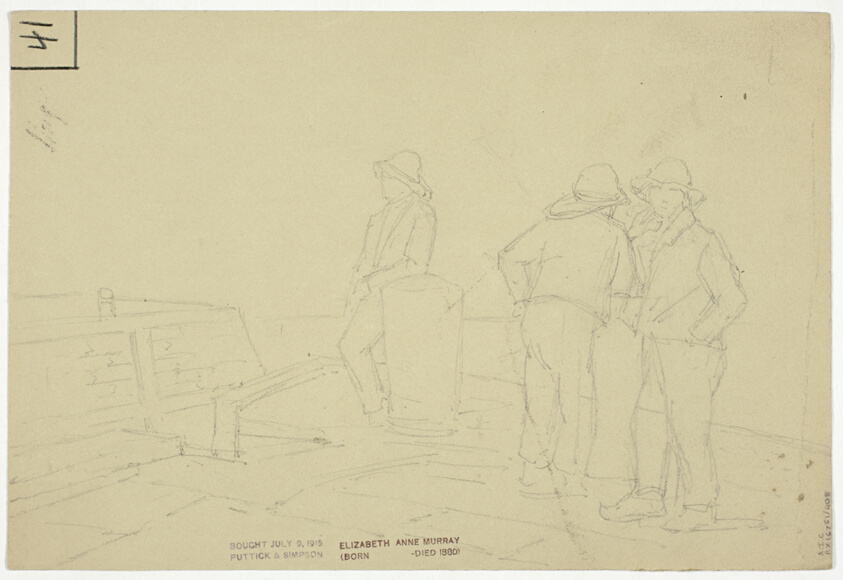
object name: Drawing and Watercolor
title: Child Asleep (recto), and Fishermen on Dock (verso)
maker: Elizabeth Murray (English, c. 1815-1882)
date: 1847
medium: Watercolor over graphite (recto), and graphite (verso), on brown-gray wove paper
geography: England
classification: watercolor; drawings (visual works); prints and drawing